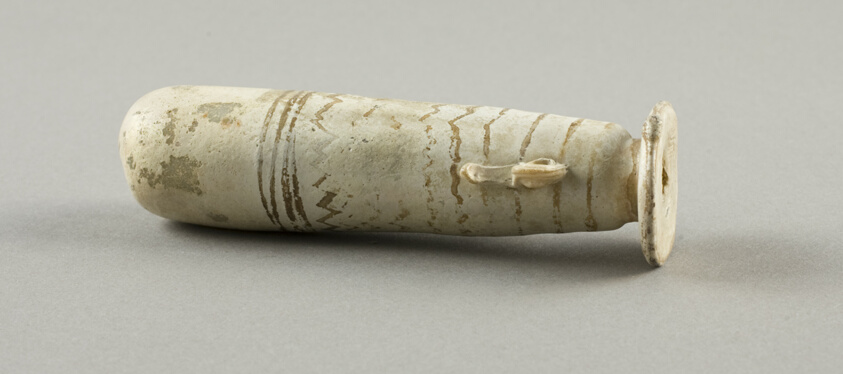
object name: Vessel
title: Alabastron (Container for Scented Oil)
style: ancient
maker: Ancient Mediterranean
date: 6th-4th century BCE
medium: Glass, core-formed technique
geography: Mediterranean Region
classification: glass; vessel; ancient art